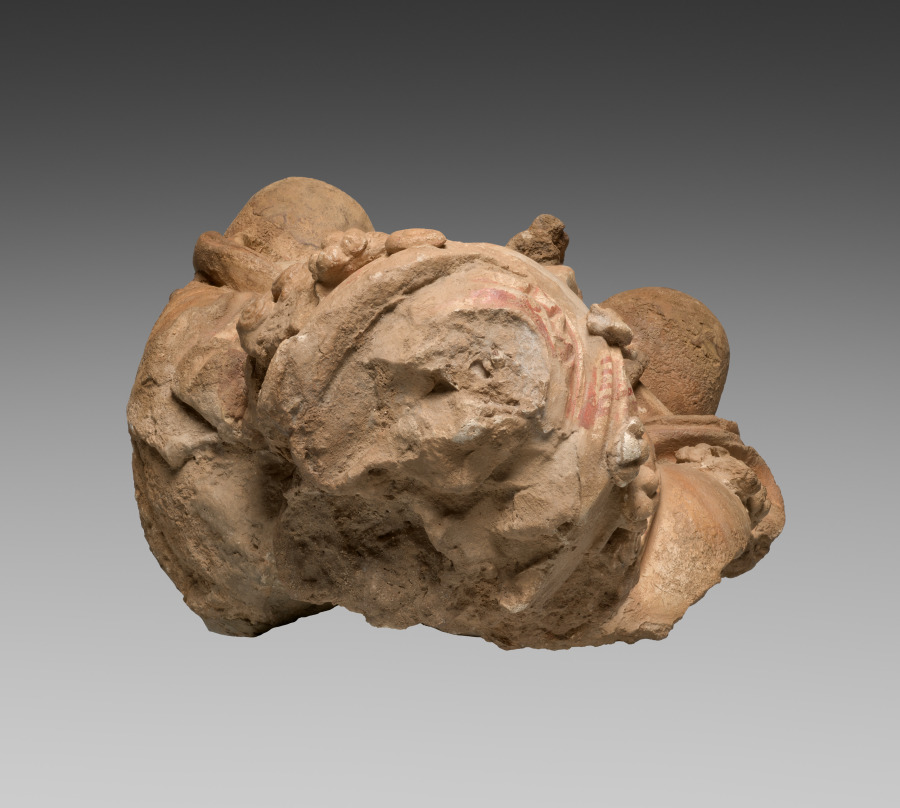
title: Adoring Attendant from a Buddhist Shrine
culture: Afghanistan, Gandhara, Kushan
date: c. 300s–400s CE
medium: stucco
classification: Sculpture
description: The medium of stucco became popular after the 4th century for works made for Buddhist sanctuaries, especially in the desert regions of Afghanistan where stone was less available. The more malleable material allowed sculptors to create sensitive and supplely modeled forms. The stucco sculptures were covered with a thin coat of lime-based whitewash, then painted; traces of original red pigment remain in some areas.